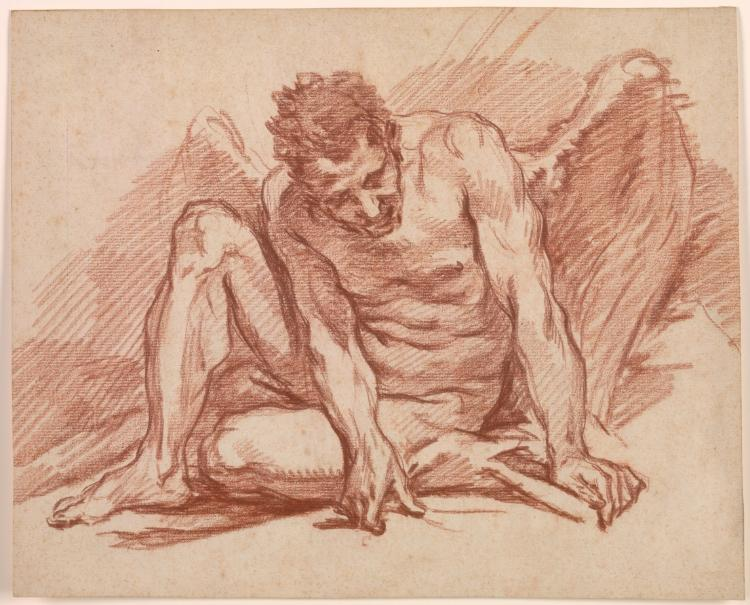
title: Male Academy with Wings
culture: France, 18th century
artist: François Boucher (French, 1703–1770)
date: 1745–50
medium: red chalk on cream laid paper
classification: Drawing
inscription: verso, upper left, in graphite: M; center right, in graphite: [c--c 2ff?] [sideways]; lower right, in graphite: [illegible, partially erased inscription four lines long]; lower center, in graphite: M[illegible]; lower right, in graphite: pr cadre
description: Academically trained artists often practiced drawing live models. Called academies, these figure studies occasionally served as preparatory drawings for paintings. Some artists crafted their academies to appeal to collectors interested in contemplating technical skill and inventiveness. Boucher may have imaginatively given wings to this male nude, who does not appear in any known painting, to demonstrate his ingenuity by transforming the model into a mythological figure.